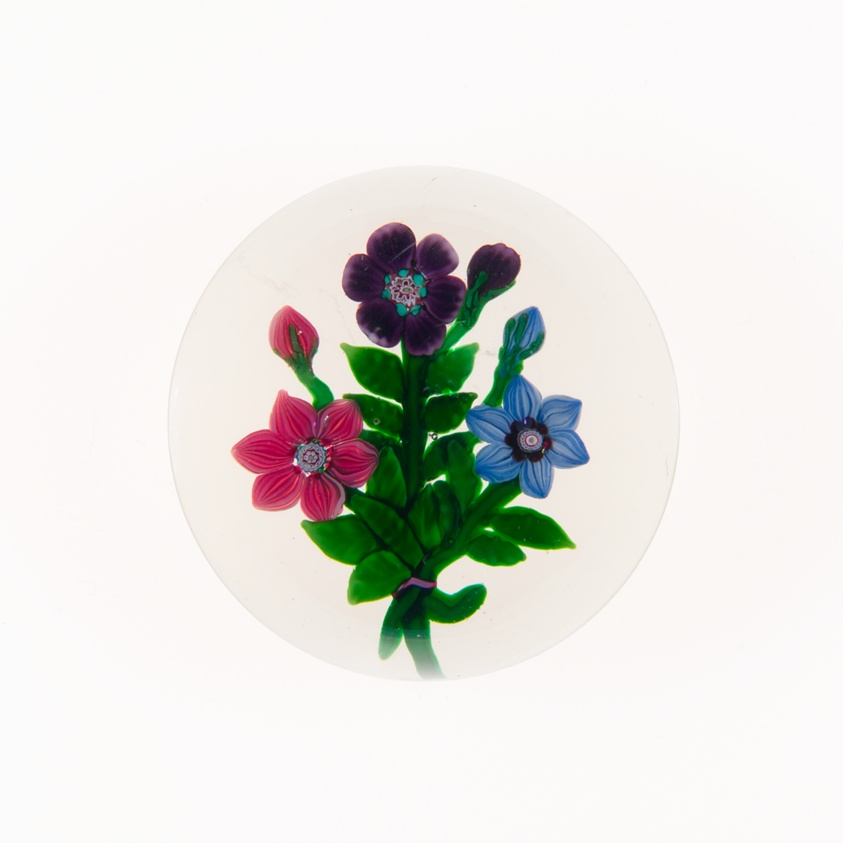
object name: Glass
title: Paperweight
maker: Clichy Glassworks (Cristalleries de Clichy); Clichy, France, 1837-1885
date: c. 1845/60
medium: Glass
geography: France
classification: paperweight; glass